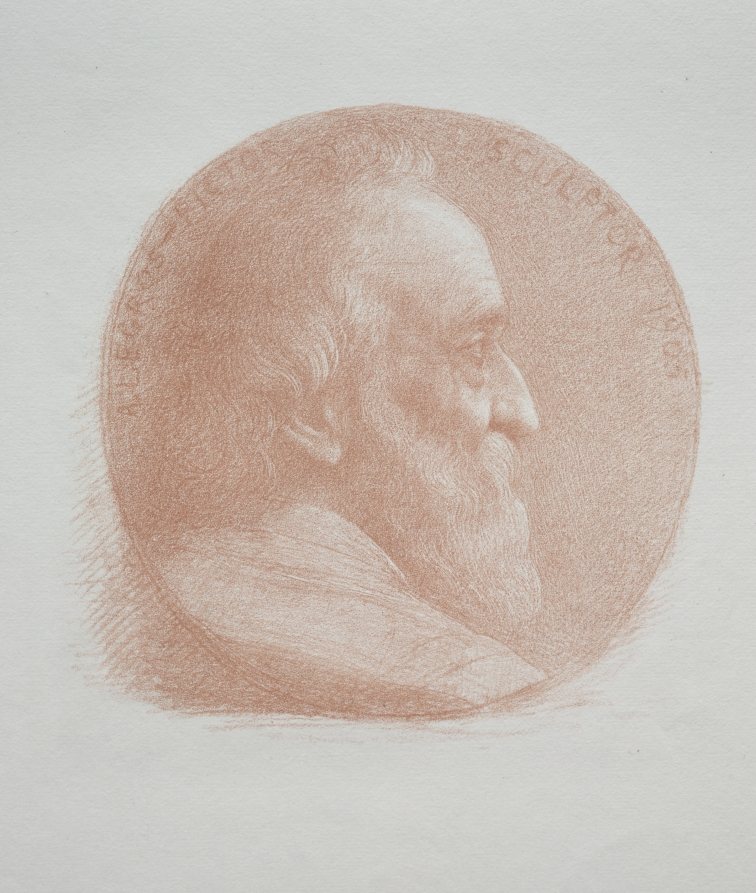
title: Self-Portrait, Medallion No. 2 (11th Plate)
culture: France, 19th-20th century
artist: Alphonse Legros (French, 1837–1911)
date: c. 1857–1911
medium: etching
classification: Print